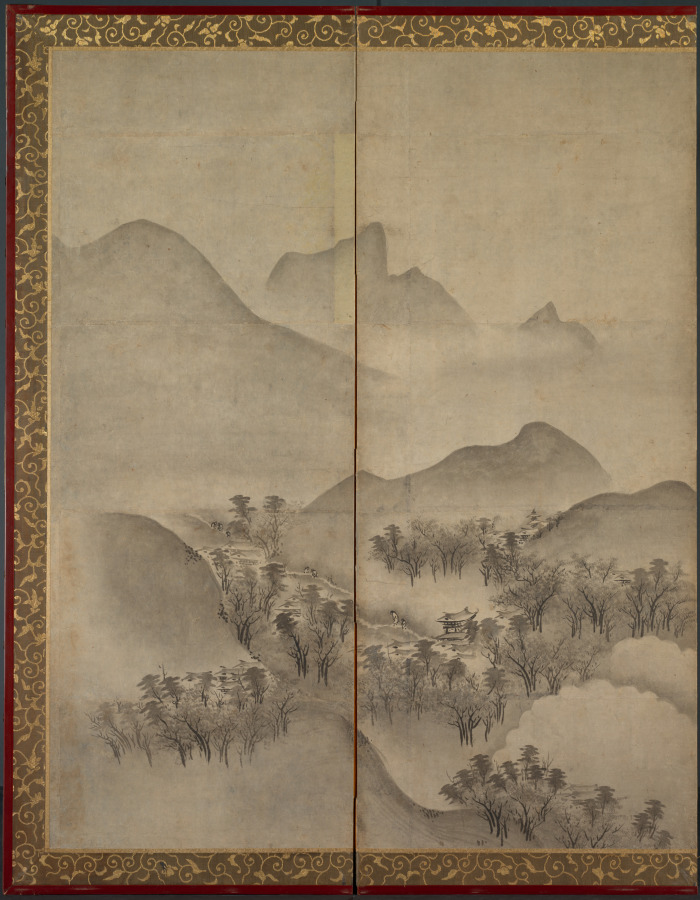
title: Moonlit Landscape (one of a pair)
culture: Japan, Muromachi period (1392–1573)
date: late 1500s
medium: six-panel folding screen, ink on paper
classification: Painting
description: This unsigned and unsealed composition includes imagery from the Eight Views of the Xiao and Xiang Rivers. Scanning the composition from right to left, four of the Eight Views subjects appear: sunset glow over a fishing village, returning sails off a distant shore, autumn moon over Lake Donting, and evening bell from a mist-shrouded temple. Not all the elements of the traditional Eight Views theme are here, but the artist suggests its literary presence by leading the viewer through a summer’s journey from one day to the next, aided, like the travelers in the landscape, by the light of the moon.